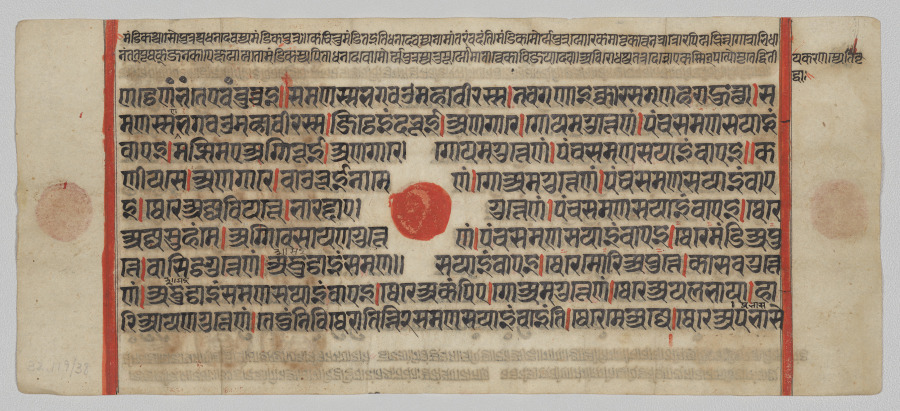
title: Text, Folio 58 (recto), from a Kalpa-sutra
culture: Western India, Gujarat, last quarter of the 15th century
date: c. 1475–1500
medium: Gum tempera, ink, and gold on paper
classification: Painting